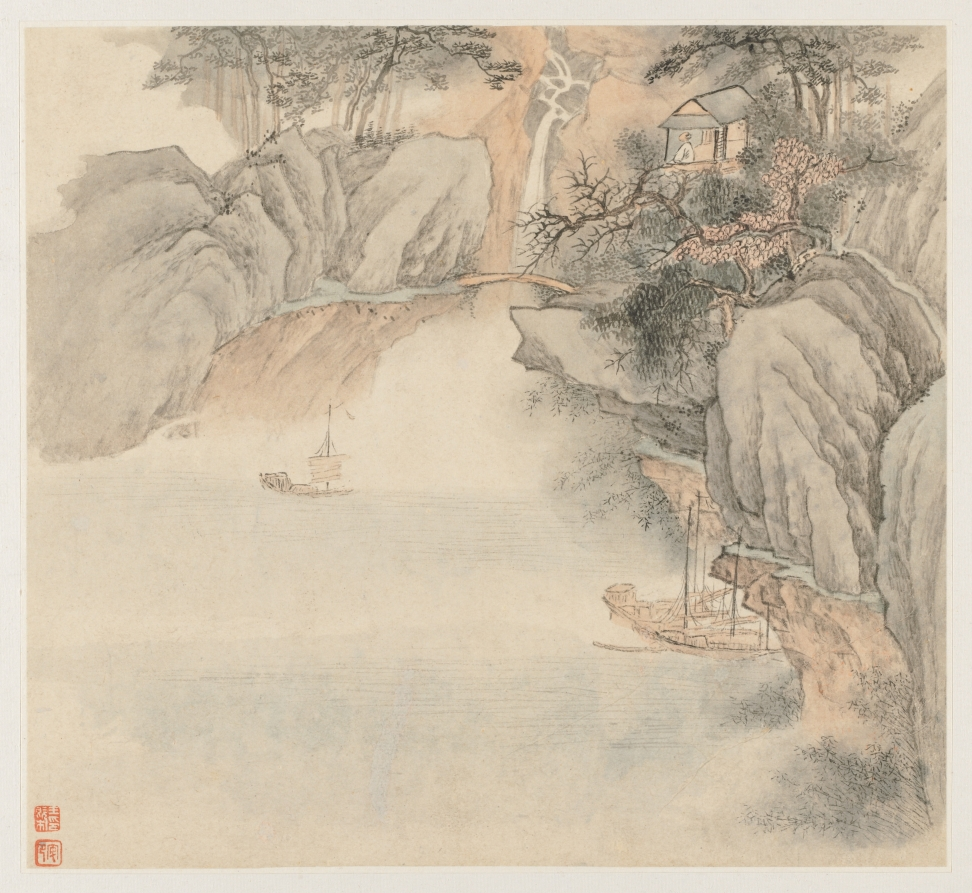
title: Album of Landscapes: Leaf 4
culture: China, Qing dynasty (1644-1911)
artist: Wang Gai (Chinese, active c. 1677–1705)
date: 1677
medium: album leaf, ink and light color on paper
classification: Painting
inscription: Poem by Mi Han-wen